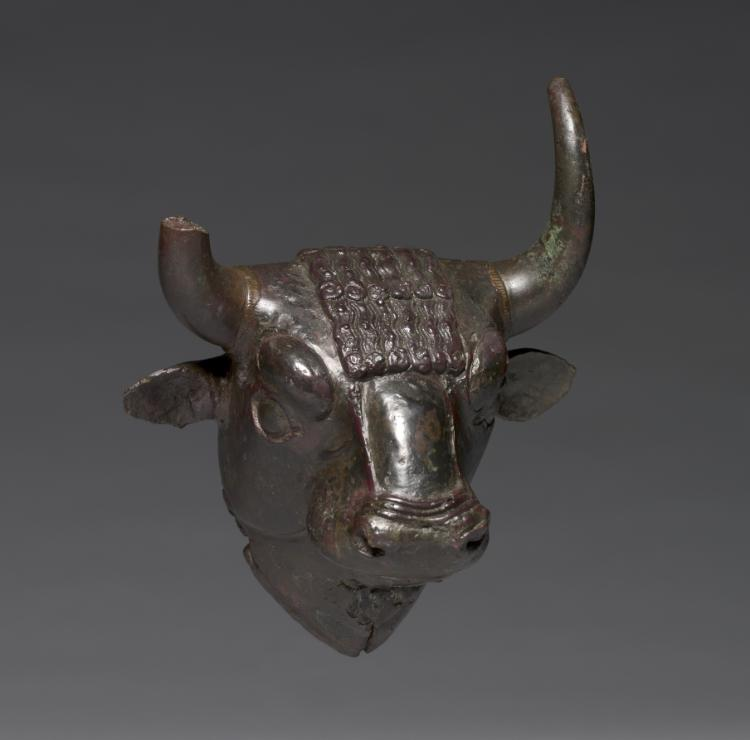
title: Bull Head Attachment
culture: Urartian, northwest Iran, possibly Gusçi, Lake Urmia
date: c. 700–600 BCE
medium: bronze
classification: Sculpture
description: The kingdom of Urartu was contemporary with the Assyrian civilization. The Urartians produced elaborate bronze objects and probably passed on many of their metalwork traditions to the Achaemenian Persians. This bull head was probably one of four placed at cardinal points around the rim of a huge Urartian bronze cauldron.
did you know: Bulls were symbols of power and fertility in many ancient cultures. This bronze bull's head was made in the kingdom of Urartu, which was located in what is Iran today, and was likely attached to the rim of a giant cauldron or cooking pot.